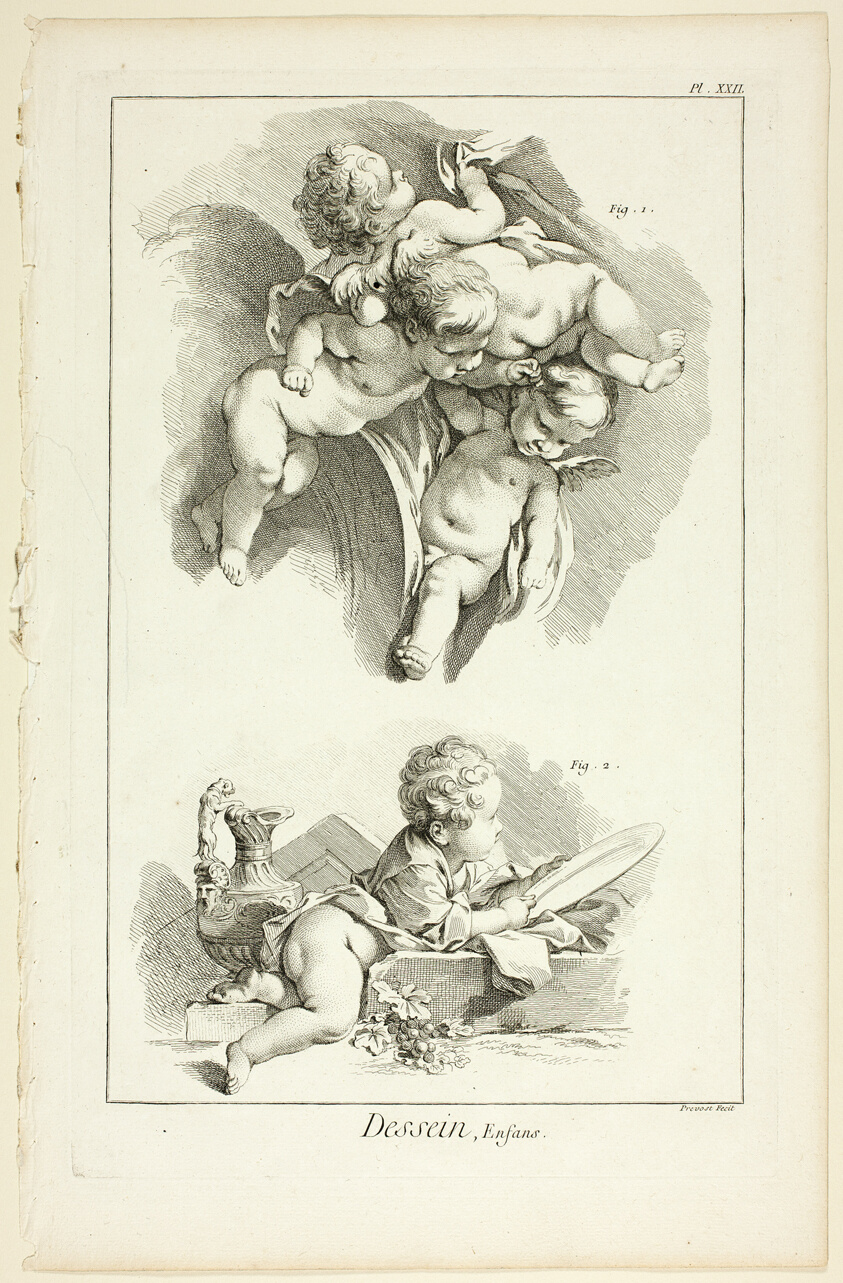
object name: Print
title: Design: Children, from Encyclopédie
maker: Benoît-Louis Prévost (French, c. 1735-1809); published by André le Breton (French, 1708-1779), Michel-Antoine David (French, c. 1707-1769), Laurent Durand (French, 1712-1763), and Antoine-Claude Briasson (French, 1700-1775)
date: 1762/77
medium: Etching, with engraving, on cream laid paper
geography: France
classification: etching; print; prints and drawing